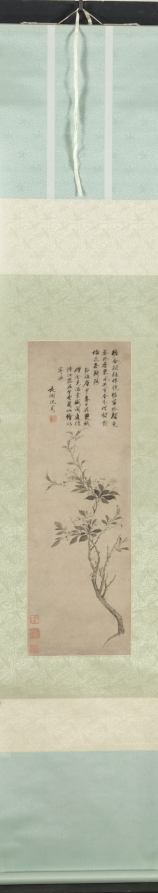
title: Flowering Crab Apple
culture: China, Ming dynasty (1368–1644)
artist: Shen Zhou (Chinese, 1427–1509)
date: 1500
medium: hanging scroll, ink on paper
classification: Painting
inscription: 粧[粉]合胭脂作曉粧，富於顔色吝於香。 東風不肯全分付，相對梅花各斷腸。 弘治庚申春日, 在雙蛾僧舍見海棠盛開, 適值陸汝器在坐索圖, 此繪以寄興。 長洲沈周 [印]啟南; 石田; 白石翁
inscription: 1 additional seal of Wu Yun 吳雲 (1811-1883).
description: Shen Zhou painted a broken branch (zhezhi 折枝) of crab apple, a fragment of nature rather than the full plant in its natural context. Shen uses calligraphic outlines in pure ink to depict the flower petals. The swift yet precise brushstrokes together with the slight S-shaped branch convey vitality. The inscription is a poem written by the artist, commenting on the lovely color and melancholic aura of the crab apple blossom. Shen Zhou is the founder of the Wu School, a group of scholars and officials active around Suzhou in eastern China, known for practicing painting and calligraphy in a refined and elegant style.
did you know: Shen Zhou painted this is an informal and rapidly done presentation picture when he was 74 years old.